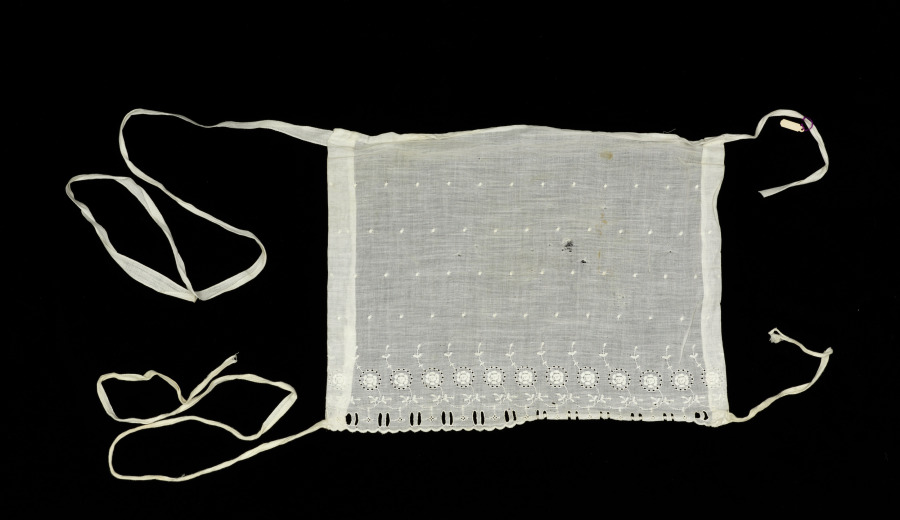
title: Woman's Costume (Chemisette)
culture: Italy, Sicily, 19th century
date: 1800s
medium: plain weave cotton (white) with embroidery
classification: Garment